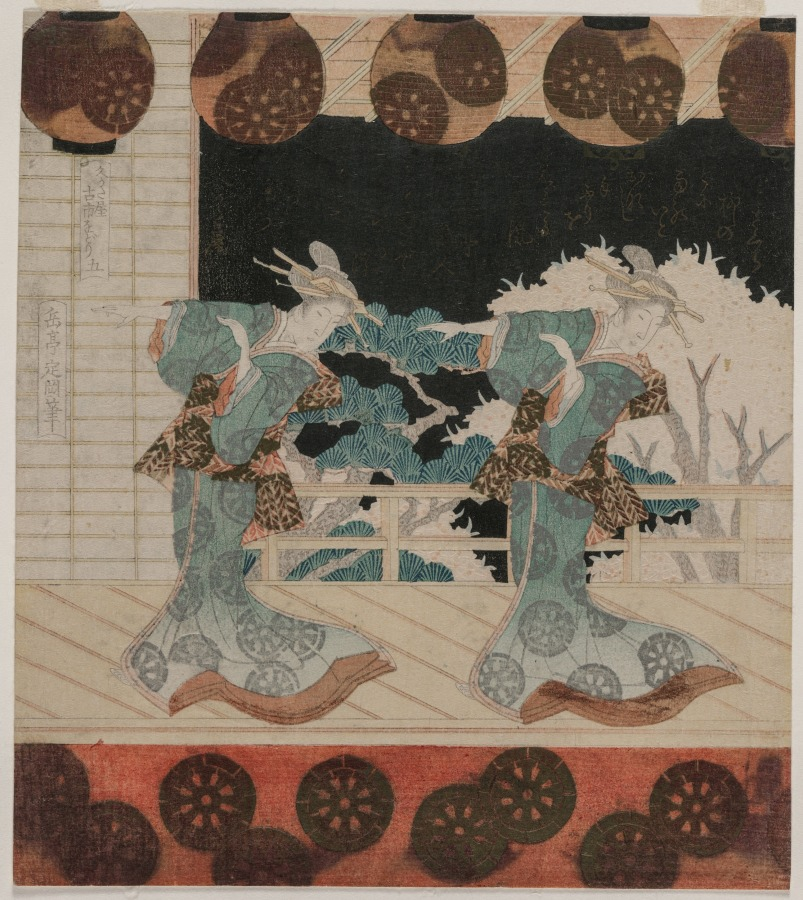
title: Furuichi Dance at the Hisagataya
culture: Japan, Edo period (1615–1868)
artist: Gakutei Harunobu (Japanese, 1786(?)–1868)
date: mid 1820s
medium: fifth of a pentaptych of woodblock prints; ink and color on paper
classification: Print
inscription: Signature: Gakutei Sadaoka hitsu